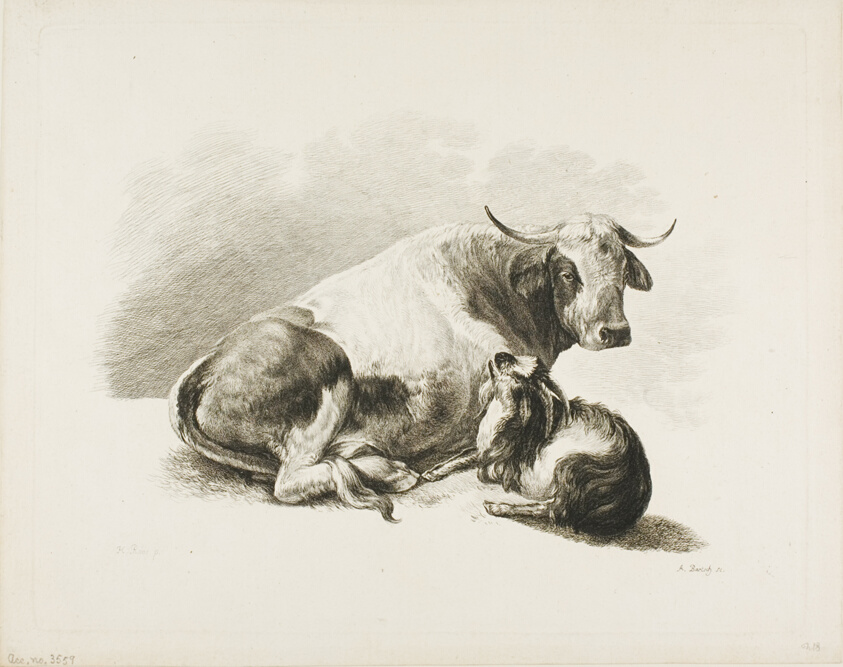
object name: Print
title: Animal Piece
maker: Adam von Bartsch (Austrian, 1757-1821)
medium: Etching on paper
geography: Austria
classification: etching; print; prints and drawing